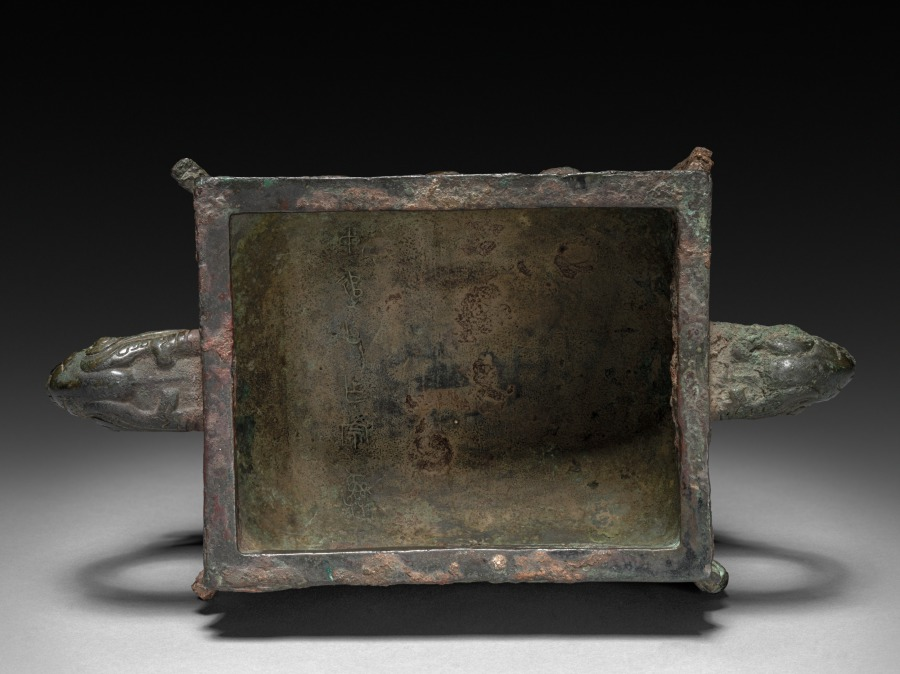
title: Kuei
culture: China, Western Zhou dynasty (c. 1046–771 BCE)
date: 1045–771 BCE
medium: bronze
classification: Metalwork